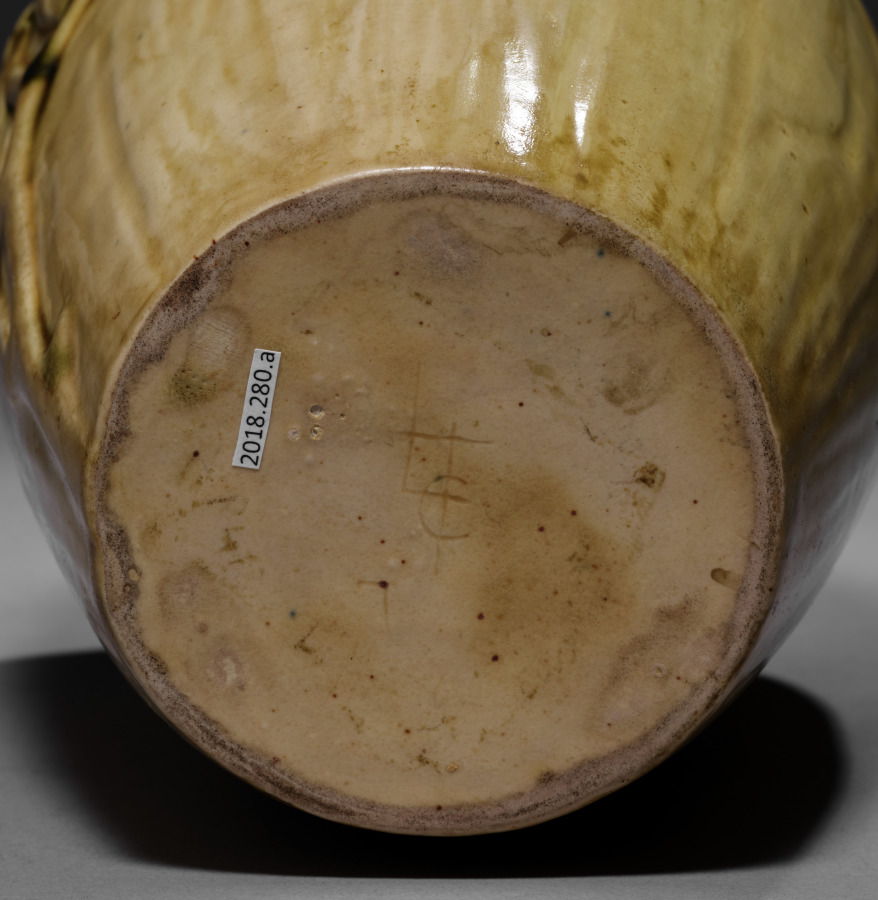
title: Ginger Jar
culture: America, New York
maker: Tiffany Studios (United States, New York, 1902–32)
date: c. 1904–14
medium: glazed white clay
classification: Ceramic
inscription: LCT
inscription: Tiffany Favrile Pottery P413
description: By 1900 Louis Comfort Tiffany had expanded his empire by increasing the firm’s production of “fancy goods,” including inkstands, candlesticks, clocks, small boxes, desk sets, tea screens, and other functional objects. Along with the array of artistic glass designs from his factory in Corona, Queens, works in ceramic, bronze, other metals, and even jewelry abounded. These smaller, more affordable luxury items were designed with as much thought to artistry as the great stained glass windows and lamps through which the firm enjoyed unrivaled success.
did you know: Ceramic works were Louis Comfort Tiffany's contribution to the art pottery movement of the early 1900s.